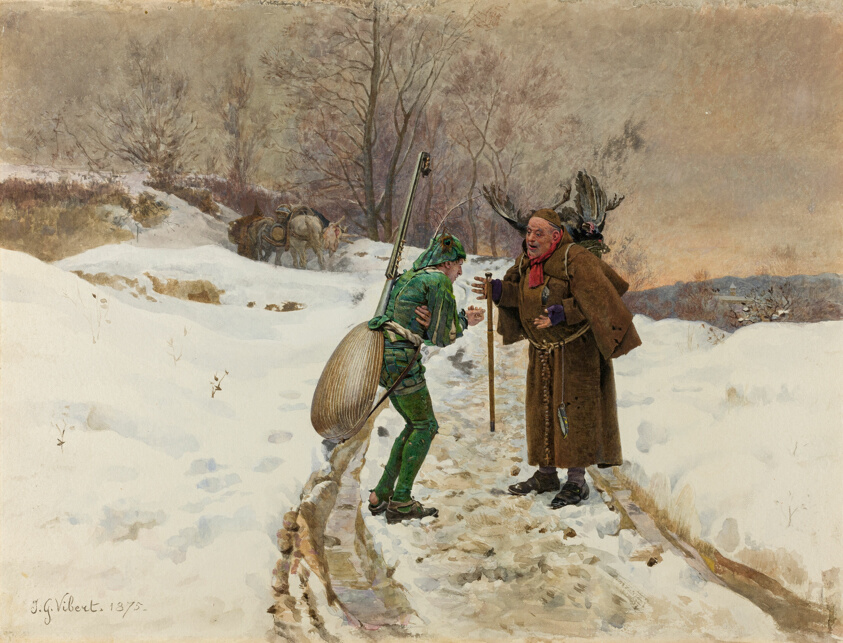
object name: Drawing and Watercolor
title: The Ant and the Grasshopper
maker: Jehan Georges Vibert (French, 1840-1904)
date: 1875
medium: Watercolor, with touches of gouache, on cream wove card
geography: France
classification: watercolor; drawings (visual works); prints and drawing